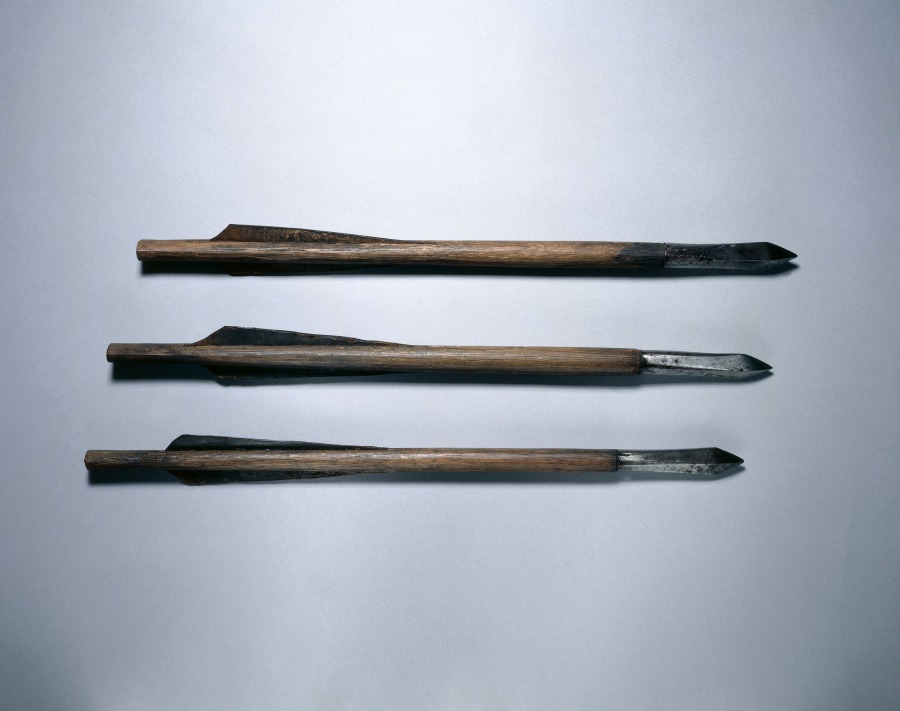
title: Crossbow Bolt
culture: Germany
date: 1500s–1600s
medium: wood, leather, steel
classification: Arms and Armor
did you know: Bolts with leather feathering were used mainly in the Tyrolean area which, includes northern Italy and western Austria.